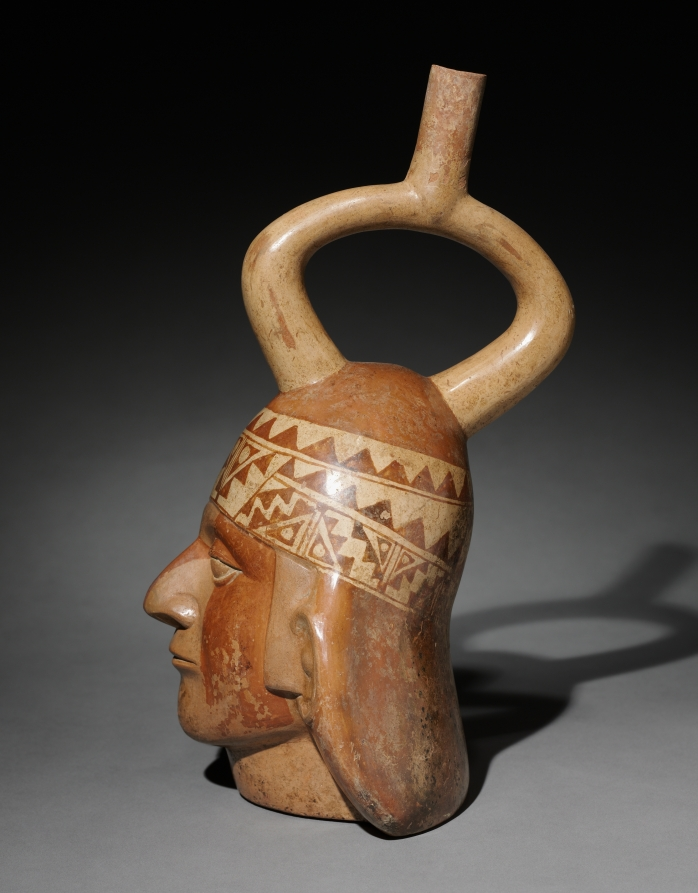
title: Portrait Head Vessel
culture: Peru, North Coast, Moche style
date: c. 200–550 CE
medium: earthenware with colored slips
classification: Sculpture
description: The Moche were unique in ancient Peru in creating realistic human portraits, usually in the form of ceramic vessels. In general, such vessels represent more than 750 individuals; identities are unclear but most are elite men, some probably rulers. The stirrup-shaped spout is a hallmark of Moche ceramic production.